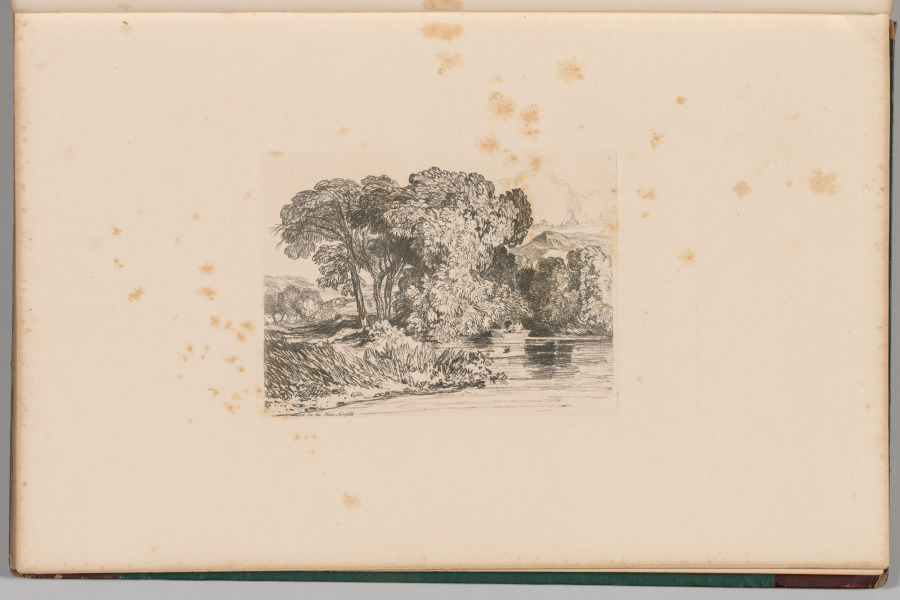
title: Liber Studiorum: Plate 4, View on the Yare, Norfolk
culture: England, 19th century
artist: John Sell Cotman (British, 1782–1842)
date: 1838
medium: softground etching, from a bound volume containing 48 plates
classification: Bound Volume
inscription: In plate, within image, upper right: 4; in plate, within image: On the Yare, Norfolk